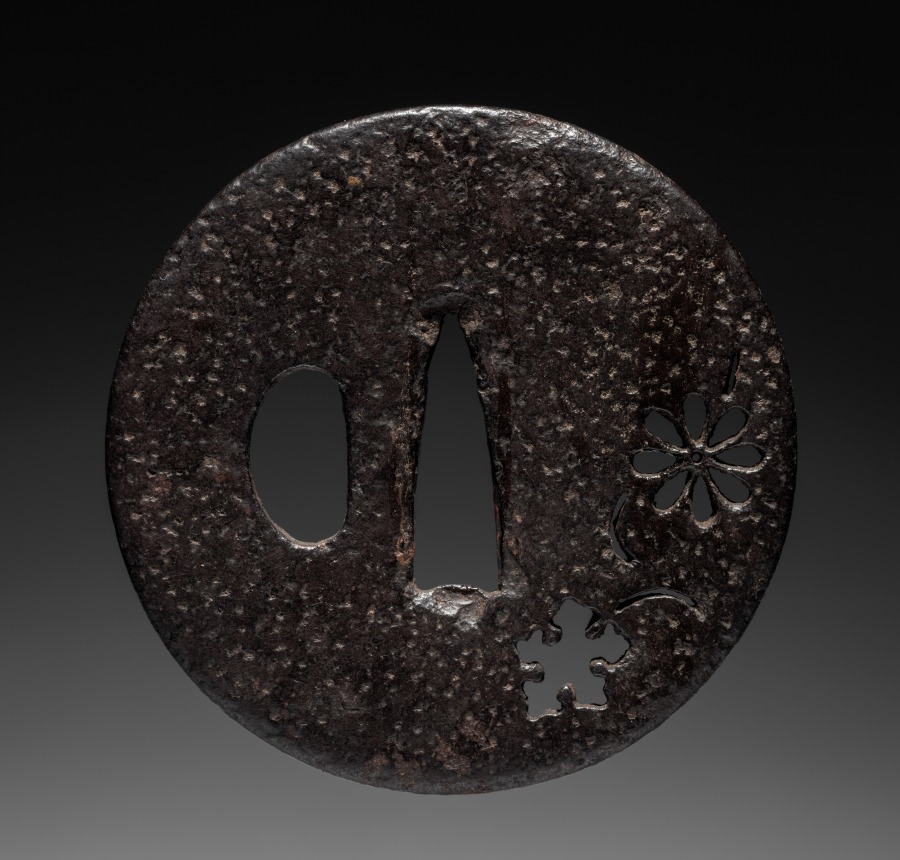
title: Sword Guard (Tsuba) with Flower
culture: Japan, possibly Edo period (1615-1868)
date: c. 1615–1868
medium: iron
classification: Arms and Armor